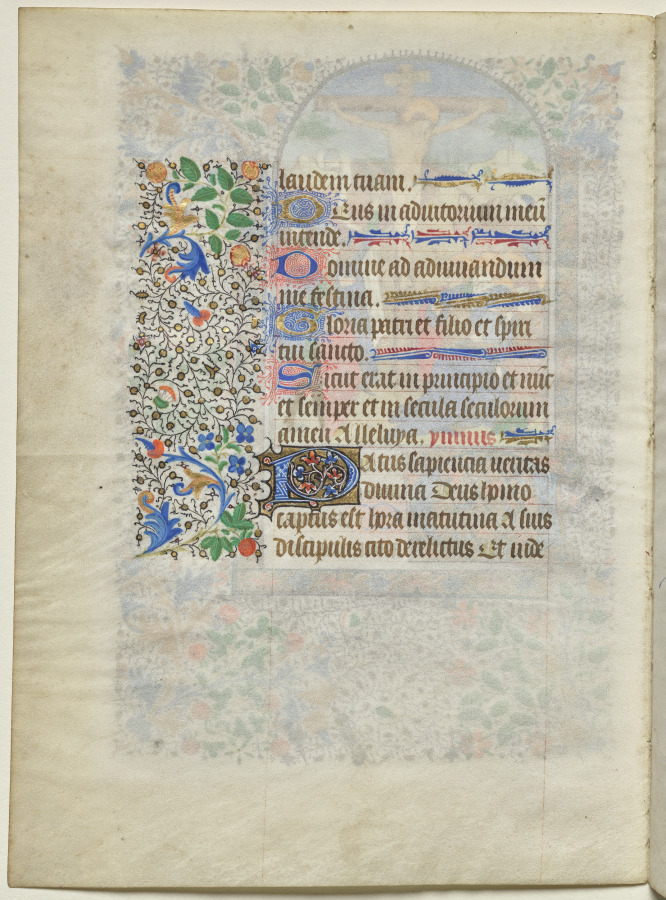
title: Bifolio from a Book of Hours: Text (verso)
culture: France (Angers, Nantes, or Poitiers)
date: c. 1435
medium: ink, tempera, and gold on vellum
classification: Manuscript